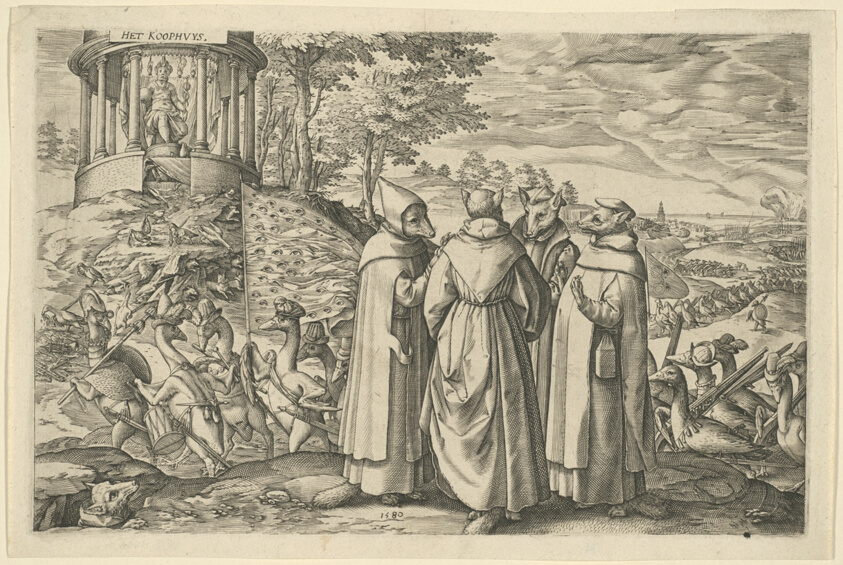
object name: Print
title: Allegory on the Defeat of the Duke of Alva at Brielle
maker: Artist unknown; Northern or Southern Netherlands, late 16th century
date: 1580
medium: Engraving in black on ivory laid paper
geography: Flanders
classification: engraving; print; prints and drawing